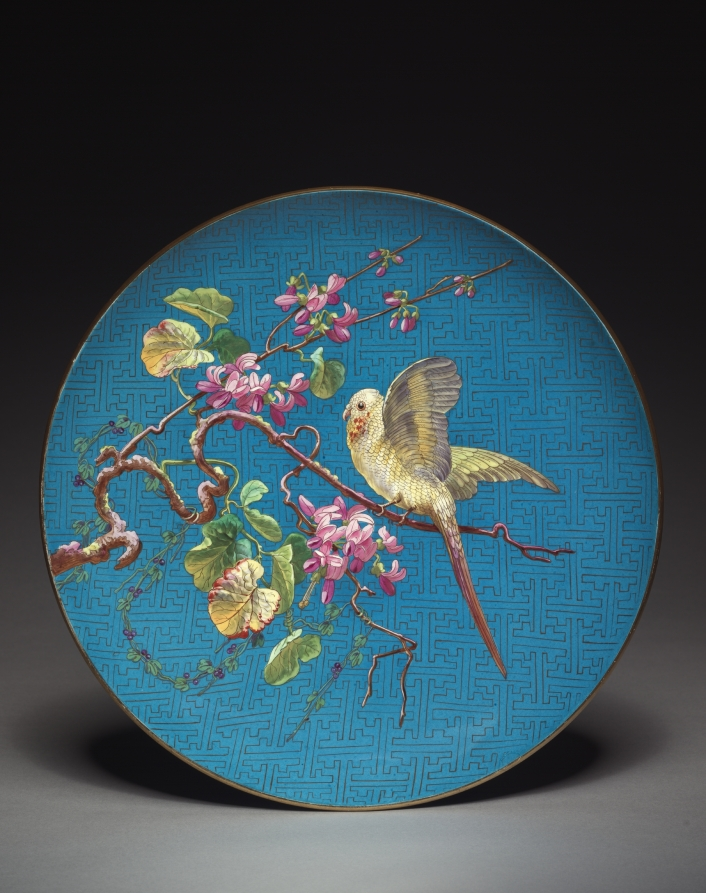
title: Charger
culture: France, 19th century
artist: Daubron frères (French)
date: 1878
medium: glazed and gilt earthenware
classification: Ceramic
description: This decorative charger is an exceptional example of the Japanese taste in 19th-century French decorative arts. Influenced by cloisonné exported by Japan when the country opened it borders to the West in the 1850s, this charger features parrots in lush foliage before a blue background that imitates cloisonné. The exceptional nature of the enamel decoration is due to the fact that this charger was created by Daubron Frères for exhibition at the 1878 Paris world's fair. An inscription on the back documents the inclusion of this particular piece in the fair.